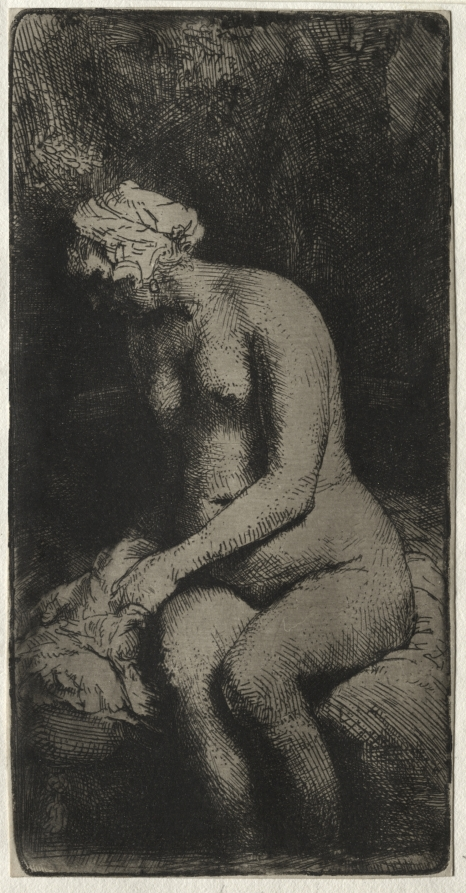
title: Woman Bathing Her Feet in a Brook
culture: Netherlands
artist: Rembrandt van Rijn (Dutch, 1606–1669)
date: 1658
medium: etching with drypoint and surface tone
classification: Print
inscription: upper left, in plate: Rembrandt f. 1658 ; SECONDARY SUPPORT, below image, in graphite: B No 200 ; lower right, in graphite: xx ; VERSO, lower center, in graphite: DTIKSSICM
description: Since the great majority of Rembrandt's works are portraits or depictions of biblical and mythological subjects, human figures are an important element of his oeuvre. During the course of a long career Rembrandt produced nine etchings of nudes, conducting a searching analysis of the feminine form. Rembrandt was an extremely innovative printmaker who experimented continuously. He understood that in etching he could obtain varied effects by controlling the inking and wiping of the plate and by printing on different types of paper. For this rare, early impression, Rembrandt carefully wiped the plate clean so that a thin layer of tone would unify the work and create the illusion that the figure is emerging from a shadowy background. Its beauty is further enhanced by the beige-toned Japanese paper, which adds warmth and a special glow to the flesh. Understandably, this superb impression once belonged to the Dukes of Devonshire and Chatsworth, who formed one of the finest old master print collections still in private hands.